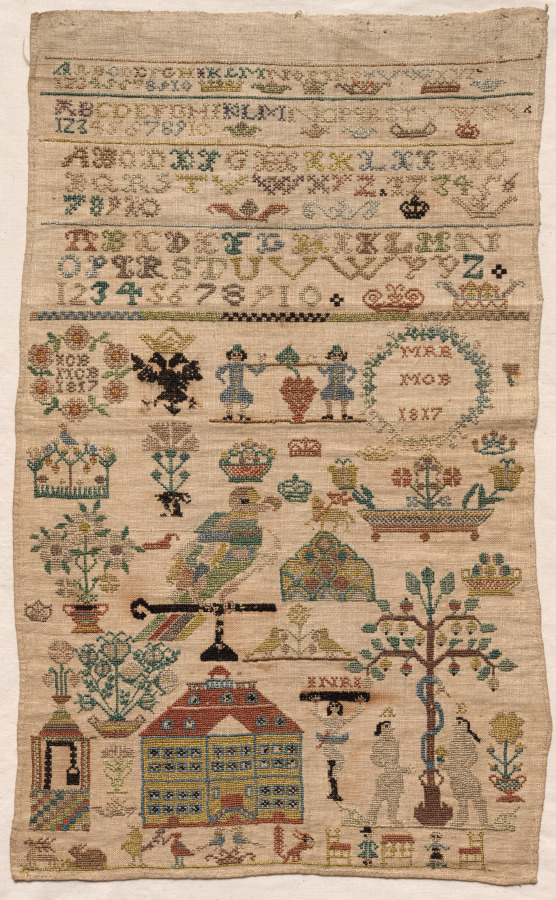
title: Sampler Fragment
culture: Netherlands, early 19th century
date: 1817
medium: embroidery; silk on linen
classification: Sampler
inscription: horizontal rows of alphabet and numerals; two wreaths enclosing initials and date: "I.C.B./ M.O.B.1817"; "M.R.B./ M.O.B./ 1817"; lower section, above Crucifixion: "INRI."